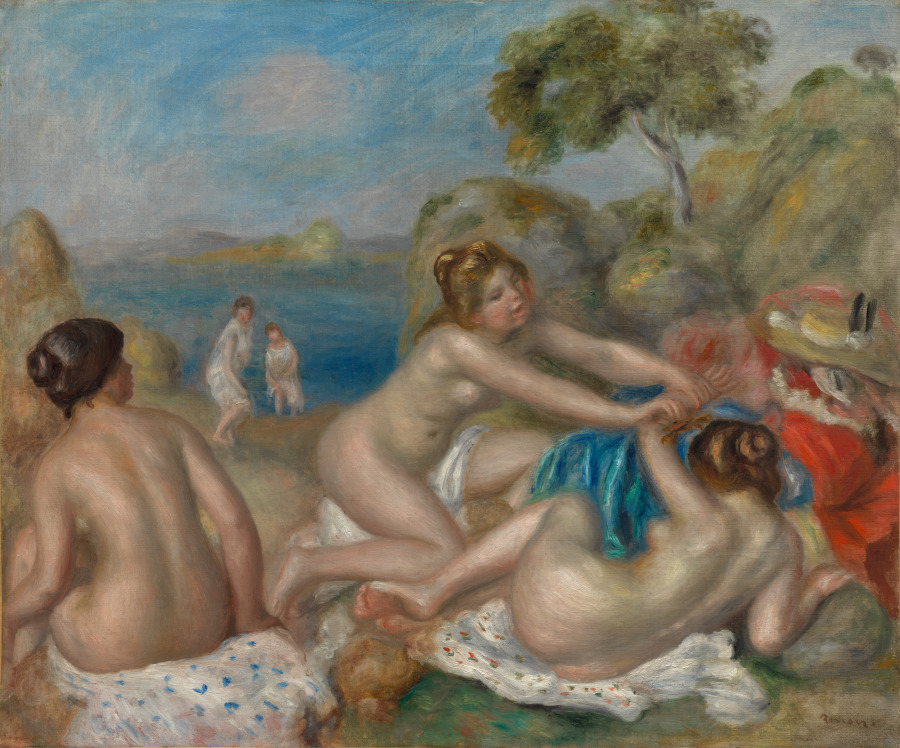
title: Bathers Playing with a Crab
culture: France, 19th century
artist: Pierre-Auguste Renoir (French, 1841–1919)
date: c. 1897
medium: oil on fabric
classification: Painting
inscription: Signed lower right: Renoir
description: After viewing Renaissance paintings on a trip to Italy in 1881, Renoir attempted to bring greater order and stability to Impressionism by merging flickering light effects with solid forms. He conveyed this new ambition in a series of paintings of nude bathers, a subject that preoccupied him from 1883 until his death in 1919. Avant-garde artists of the 20th century admired his ability to blend modernist and classicizing tendencies.